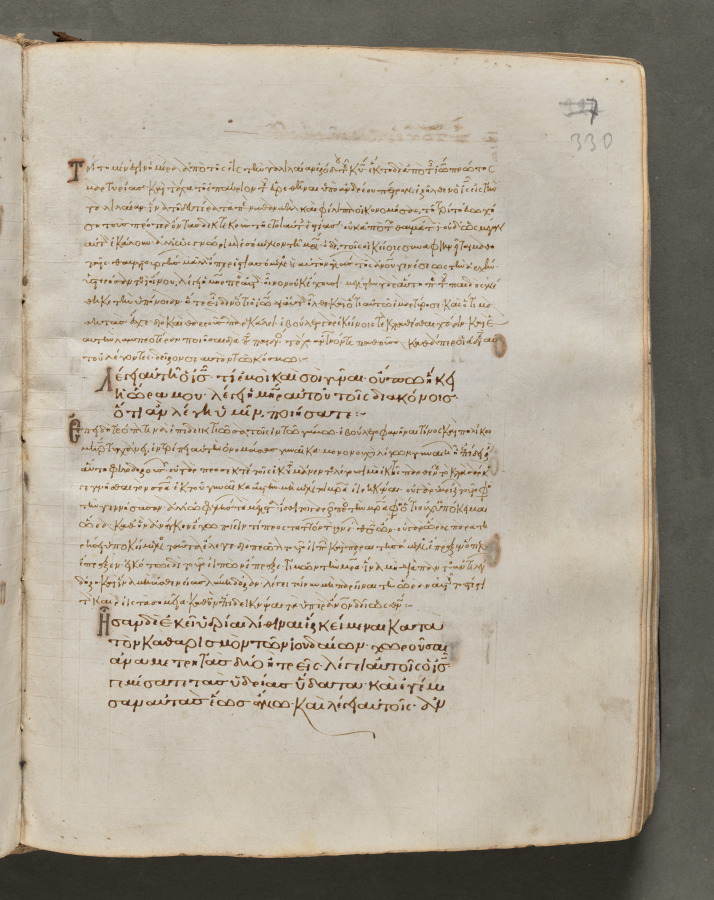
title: Text, folio 330 (recto), from a Gospel Book with Commentaries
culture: Byzantium, Constantinople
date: c. 1000–1100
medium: ink, tempera, and gold on vellum; leather binding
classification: Bound Volume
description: Each of the four gospels in this book opens on a page with brilliantly illuminated borders depicting the author of the text as well as birds—principally peacocks, symbols of the immortality of the soul—and fountains, representing the fountain of life and the salvation of the soul. This volume consists of 428 leaves with texts in Greek. Its level of sophistication suggests that it was probably written and decorated in a monastery in Constantinople.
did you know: Gospel books were carried in procession through Byzantine churches.